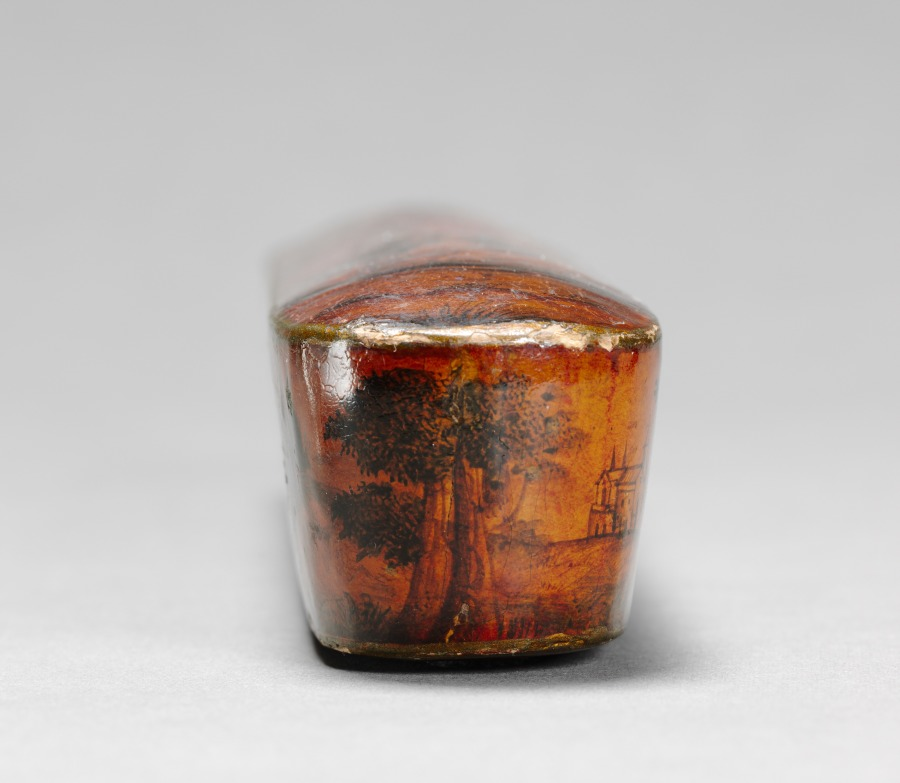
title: Pen and Ink Box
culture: Iran, Qajar period (1779-1925)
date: 1800s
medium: lacquer over papier maché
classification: Lacquer